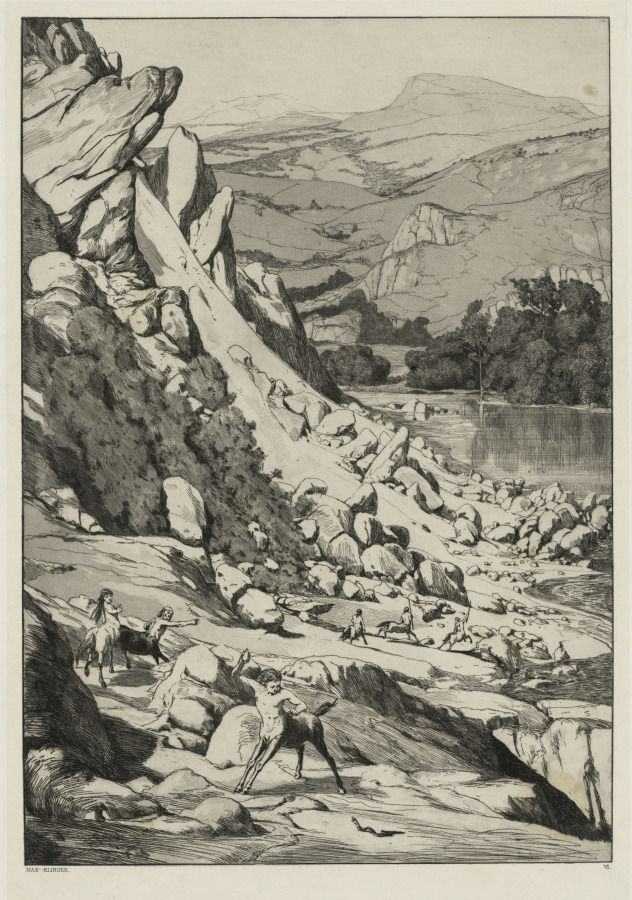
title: Landslide (Opus IV, 6)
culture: Germany, 20th century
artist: Max Klinger (German, 1857–1920)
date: 1881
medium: etching, aquatint and roulette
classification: Print